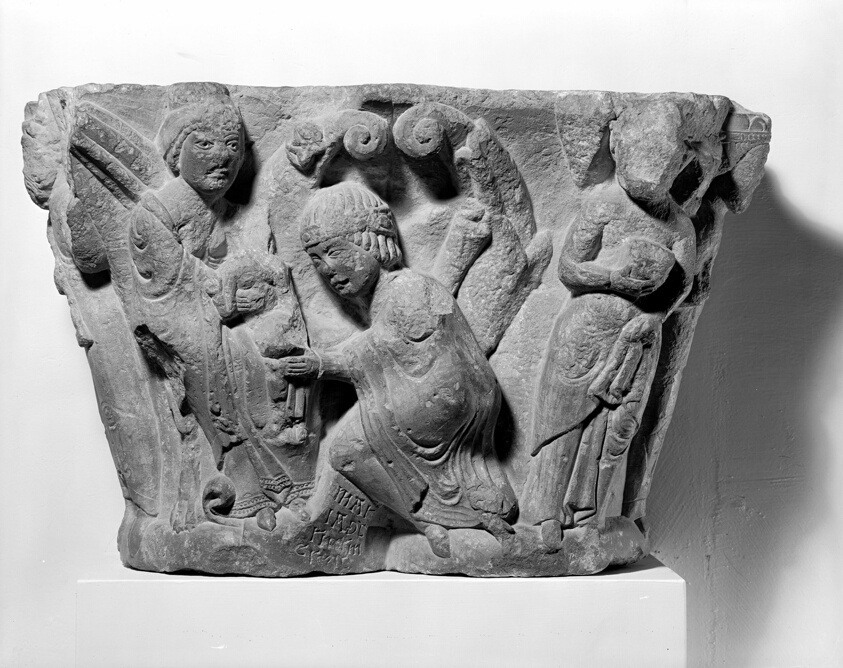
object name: Sculpture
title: Capital with the Adoration of the Magi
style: medieval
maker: Spanish; Aragon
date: 1110/30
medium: Limestone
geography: Spain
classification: architectural sculpture; sculpture; spanish; sculpture/stone; stone; limestone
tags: architechture, architectural, architectural fragment, architectural fragments, Christian subjects, Christianity, king, religion, religious, religious scenes